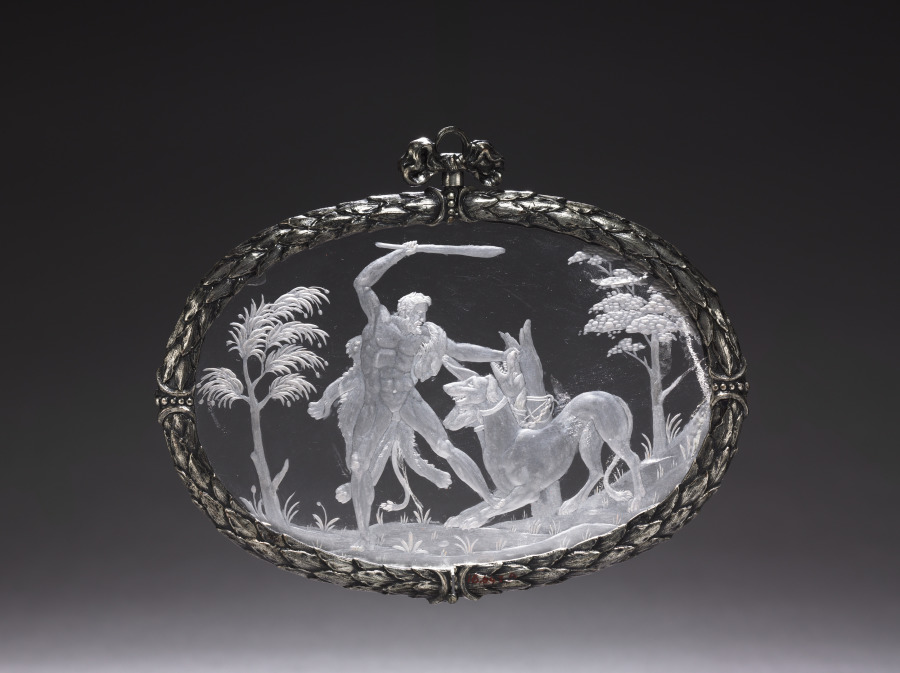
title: Hercules Conquering Cerberus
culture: Italy, 17th century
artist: attributed to Annibale Fontana (Italian, 1540–1587)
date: before 1584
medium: rock crystal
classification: Rock crystal